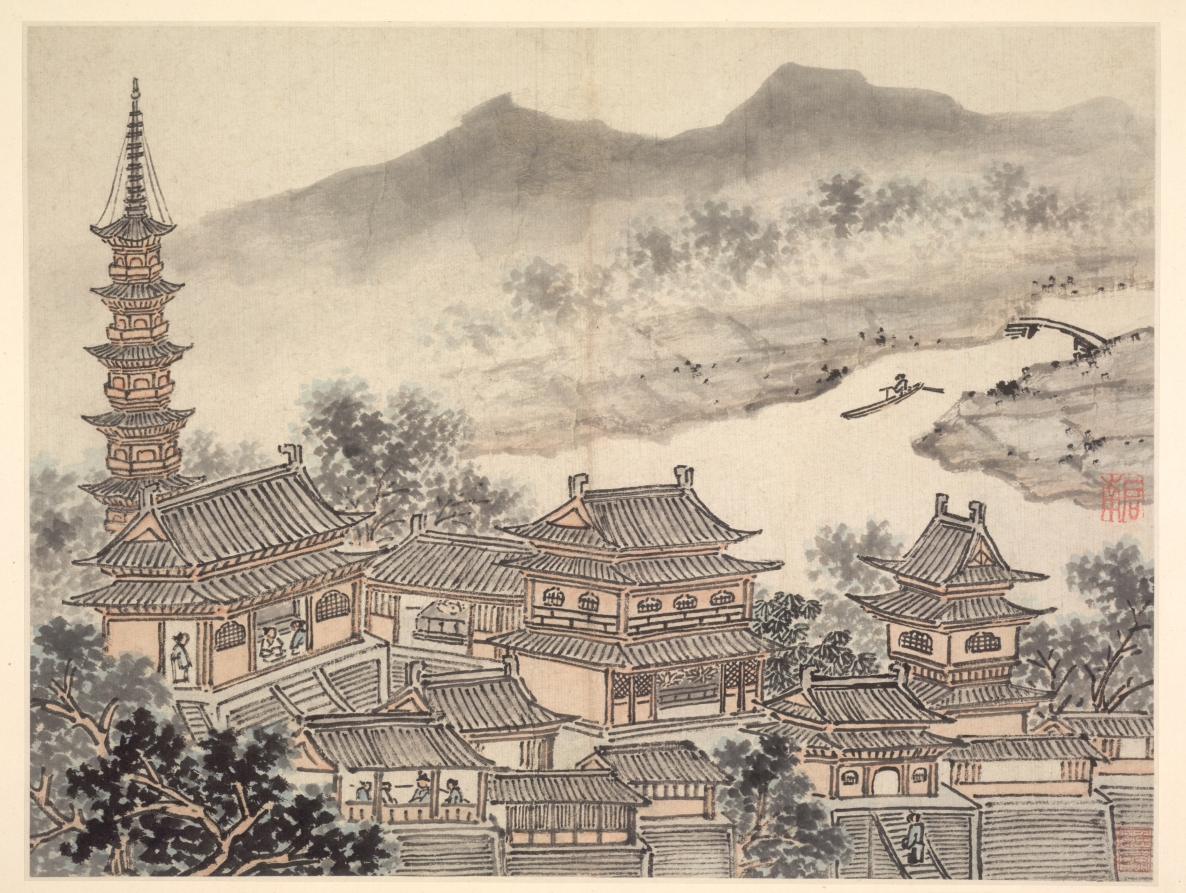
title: The Thousand Buddha Hall and the Pagoda of the "Cloudy Cliff" Monastery, from Twelve Views of Tiger Hill, Suzhou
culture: China, Ming dynasty (1368–1644)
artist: Shen Zhou (Chinese, 1427–1509)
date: after 1490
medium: Album leaf; ink on paper or ink and slight color on paper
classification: Painting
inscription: [印] 启南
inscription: seal of Hou Shigong 侯士恭 [late 19th–early 20th century]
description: Views of Tiger Hill depicts a historic site a few miles northwest of Suzhou. The scenes simulate a visit from arriving by boat at the foot of the mountain to climbing to Cloudy Cliff Monastery. Representations of the artist’s mature style, Shen Zhou included views in subtle colors in the suite of monochrome scenes. A Suzhou native, Shen Zhou was supported by family wealth and rejected an official career in favor of life as a retired scholar. Turning to painting in midlife, he is regarded as the founder of the Wu School of painting, with its center in Suzhou.